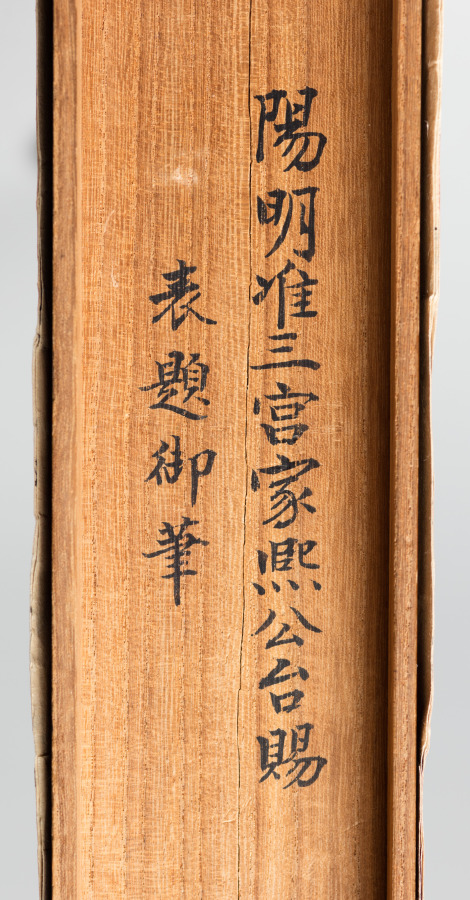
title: Landscape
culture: Japan, Edo period (1615–1868)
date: early 1600s to mid-1800s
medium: hanging scroll; ink on paper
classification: Painting